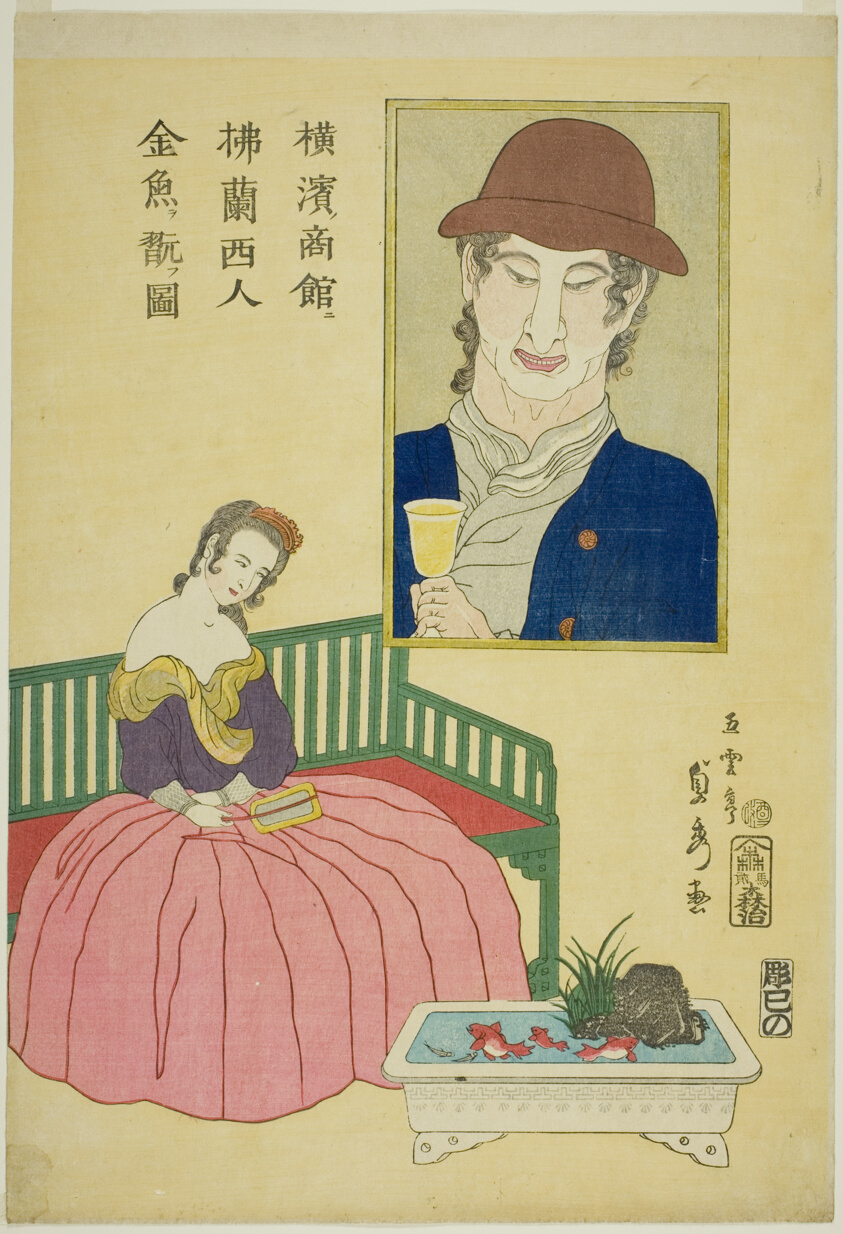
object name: Print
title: French Woman Admiring Goldfish at a Shop in Yokohama (Yokohama no shokan ni Furansujin kingyo wo moteasobu zu)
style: Japanese (culture or style)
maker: Utagawa Sadahide (Japanese, 1807-1873)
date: 1861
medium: Color woodblock print; oban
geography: Japan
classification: woodblock print; print; asian art